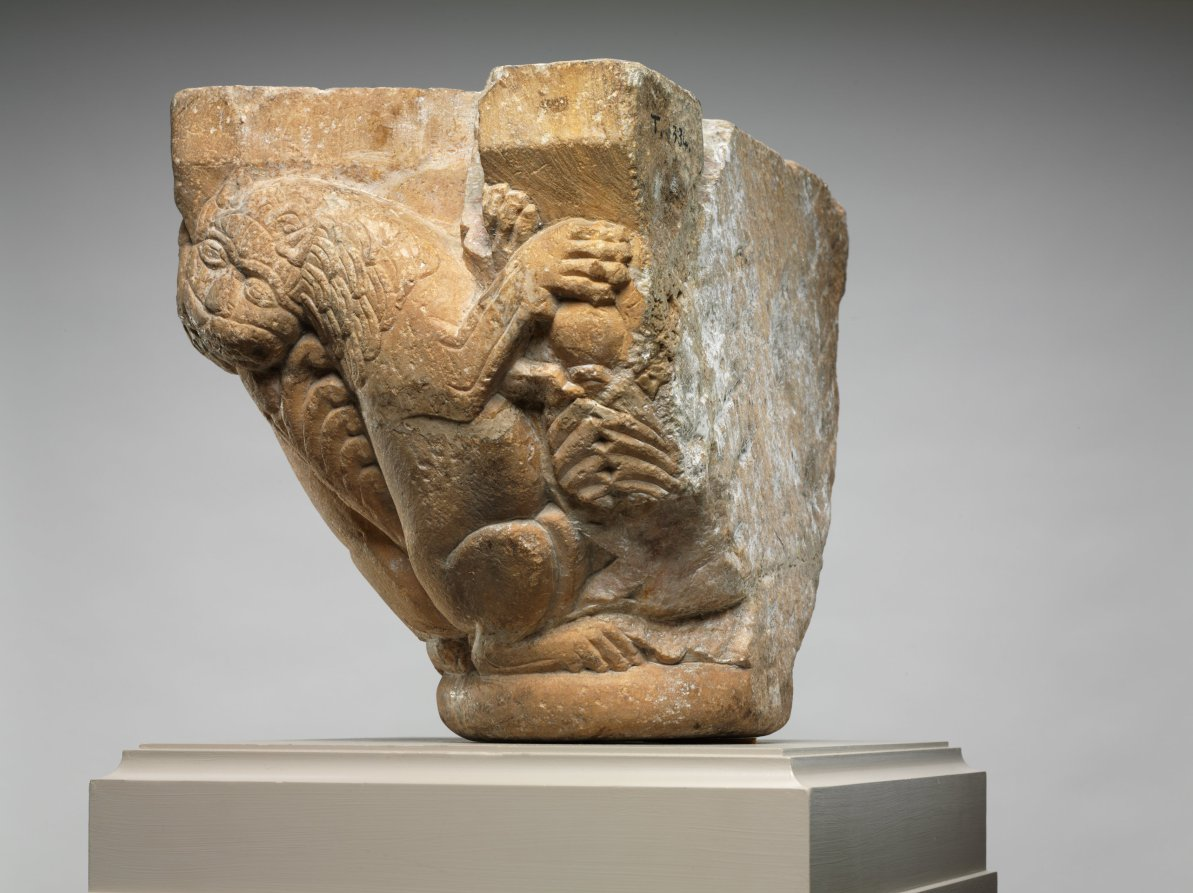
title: Engaged Capital with Lions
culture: Northern Spain (Navarre ?) or Southwest France (Pyrénées or Roussillon ?), mid-12th century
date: 1145–64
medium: marble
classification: Sculpture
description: The compositional motif of confronted and addorsed beasts illustrated on this capital was especially popular in churches along the pilgrimage roads.